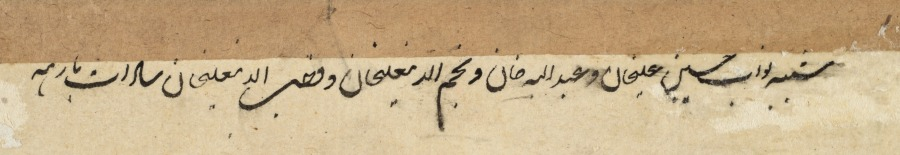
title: Husain Ali Khan Entertaining His Brothers (The Sayyid Brothers)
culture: India, Mughal Dynasty (1526-1756)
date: c. 1712–19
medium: Gum tempera, ink, and gold on paper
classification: Painting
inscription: Persian inscription at bottom, in nasta‘liq script: Portraits of Nawab Husayn-Ali Khan and Abdullah Khan and Najm al-Din Ali Khan and Fakhr al-Din Ali Khan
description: The shrewd imperial oligarch smoking the hookah and his brothers ran the Mughal government after the death of Emperor Alamgir in 1707 until the rise of Emperor Muhammad Shah in 1719. They were ruthless, self-serving kingmakers who caused the assassinations and accessions of six different members of the royal family to the Mughal throne in Delhi. The two attendants behind him exchange a worried glance, and the rare use of a flat gray sky behind the white marble terrace suggests the artist’s mood about the future strength and prosperity of the empire.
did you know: The man shown smoking a hookah is the Mughal imperial ruler.